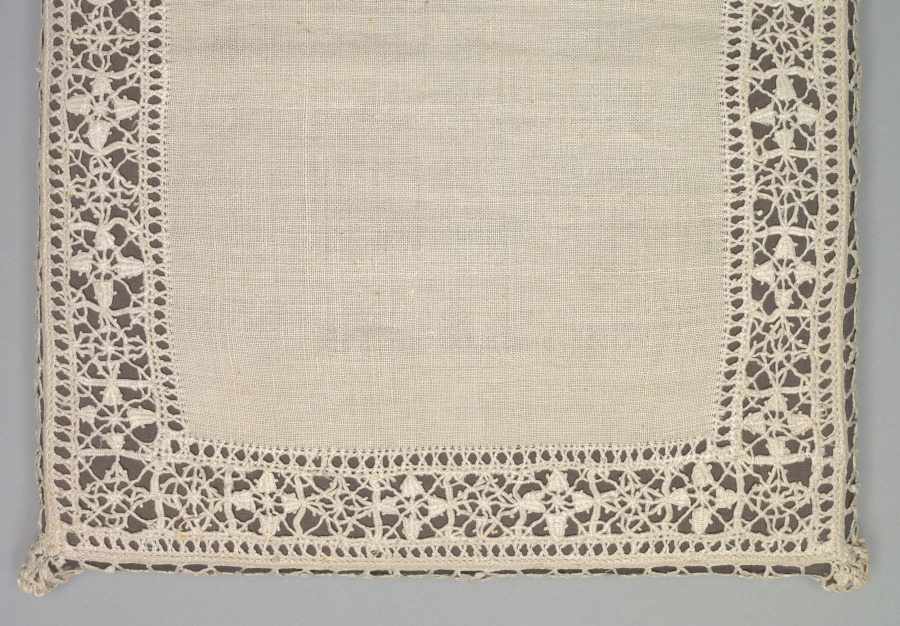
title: Lace Pillow Cover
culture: Italy, Genoa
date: 1600s–1700s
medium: Linen: needle lace (reticella) and bobbin lace edging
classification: Lace